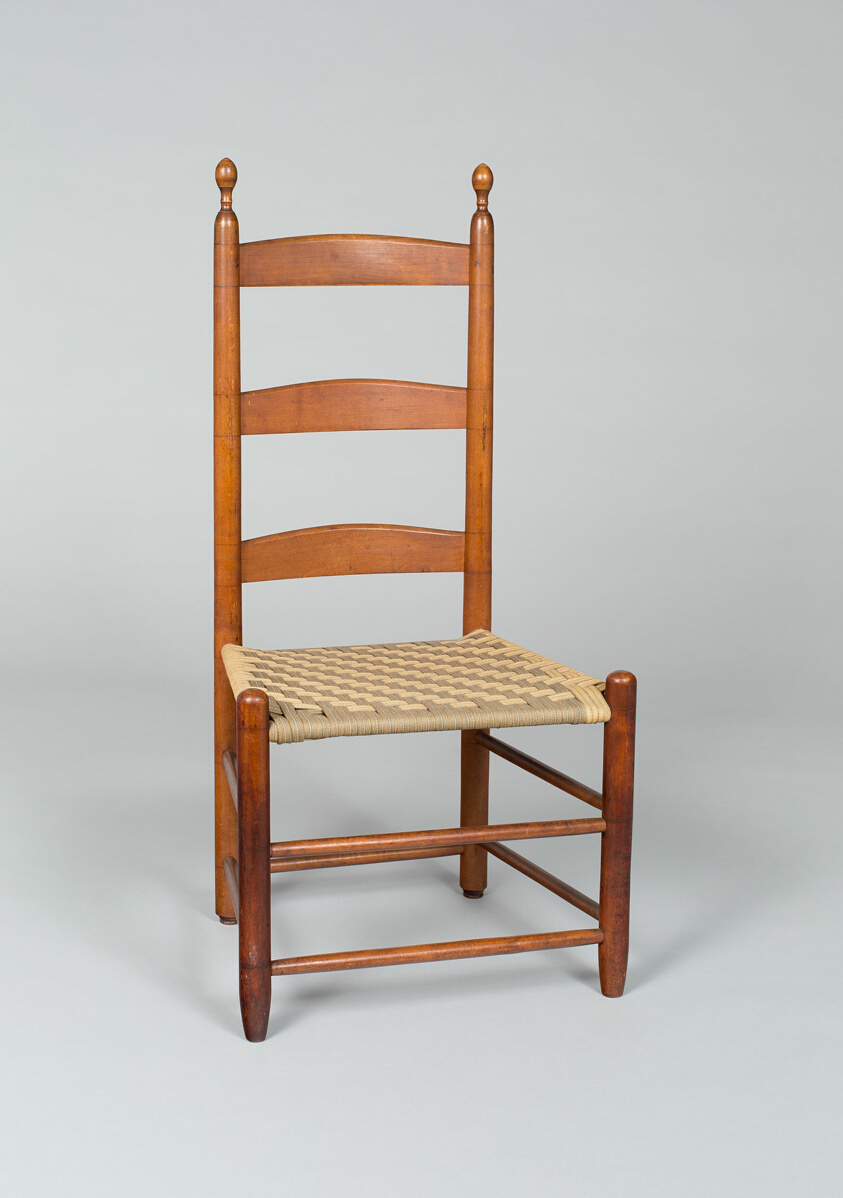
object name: Furniture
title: Side Chair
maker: Shaker Colony; American, 19th century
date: 1831–40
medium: Birch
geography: United States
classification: seating; furniture; american decorative arts; american arts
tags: furniture